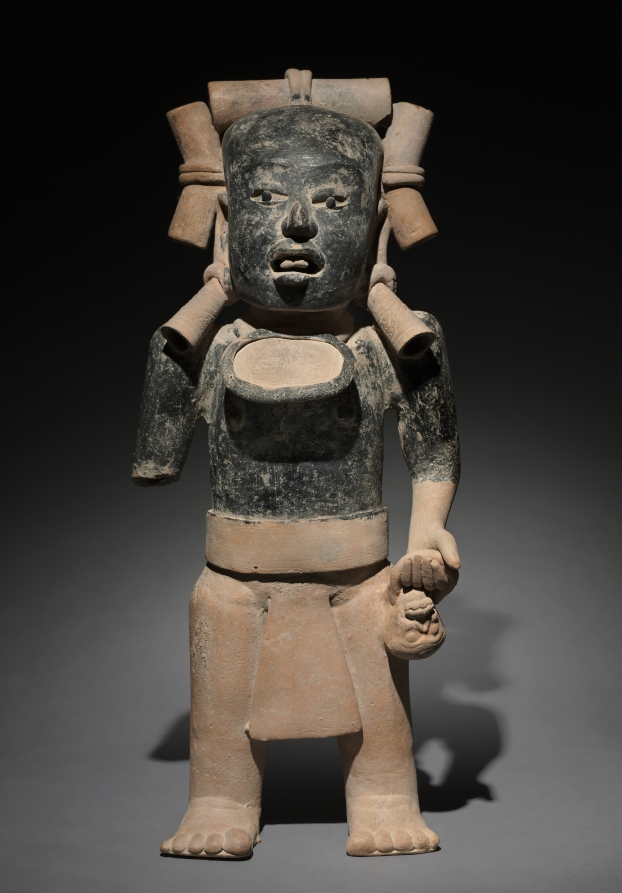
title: Standing Male Figure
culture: Mexico, Gulf Coast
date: 300–900 CE (thermoluminescence date, 240–945 CE)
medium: earthenware, asphalt and resin paint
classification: Sculpture